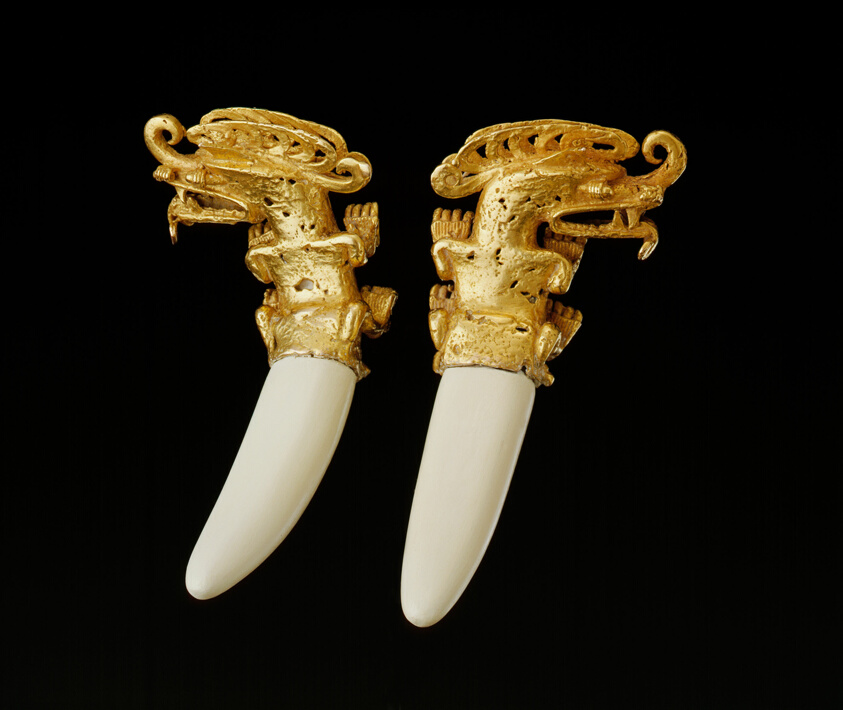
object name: Costume and Accessories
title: Double Pendant in the Form of a Mythical Saurian with Tusks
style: coclé, Pre-Columbian, americas, lower central america, Arts of the Americas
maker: Coclé (Coclé province, Panama)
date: 800–1200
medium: Gold with plaster restoration of boar tusks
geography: Panama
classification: pendant (jewelry); metal; jewelry; art of the americas; costume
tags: supernatural, animals, iguana, serpents, costume